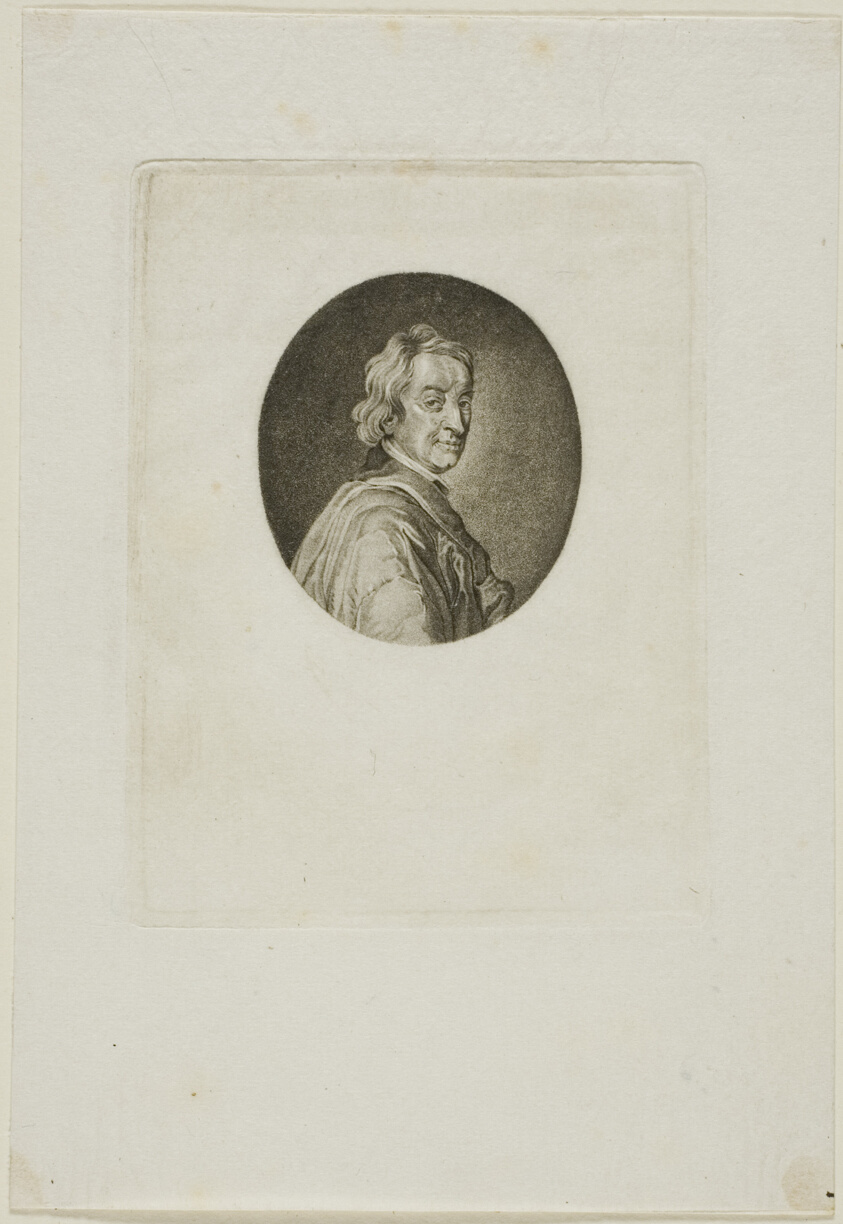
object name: Print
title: John Dryden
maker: Jean-Baptiste de Grateloup (French, 1735-1817); Jean Pierre Sylvestre (French)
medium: Engraving on paper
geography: France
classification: aquatint; print; prints and drawing